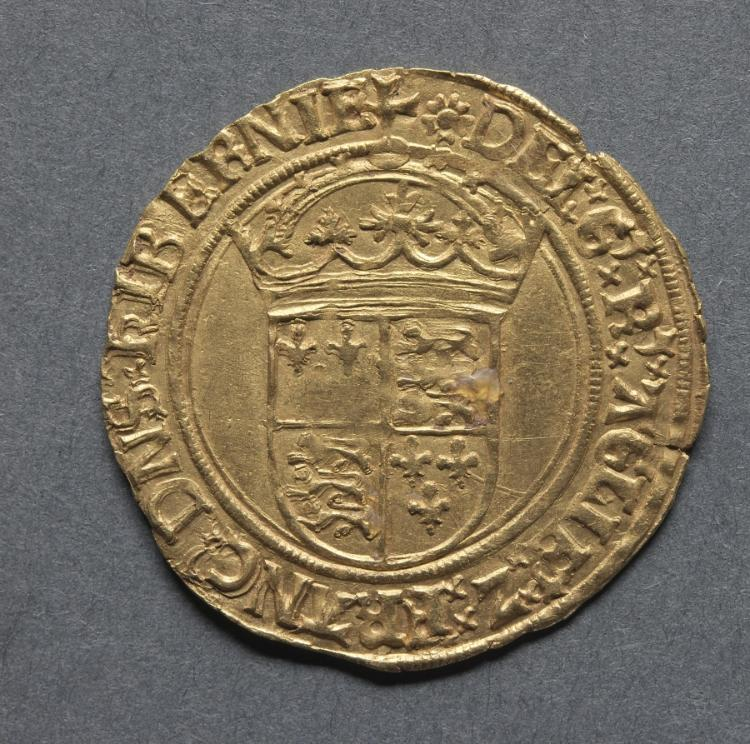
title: Crown of the Double Rose: Crowned Royal Arms (reverse)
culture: England, Henry VIII, 1509-1547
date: 1526–1533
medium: gold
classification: Coins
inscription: DEI GR ANGLIE Z FRANC DNS HIBERNIE